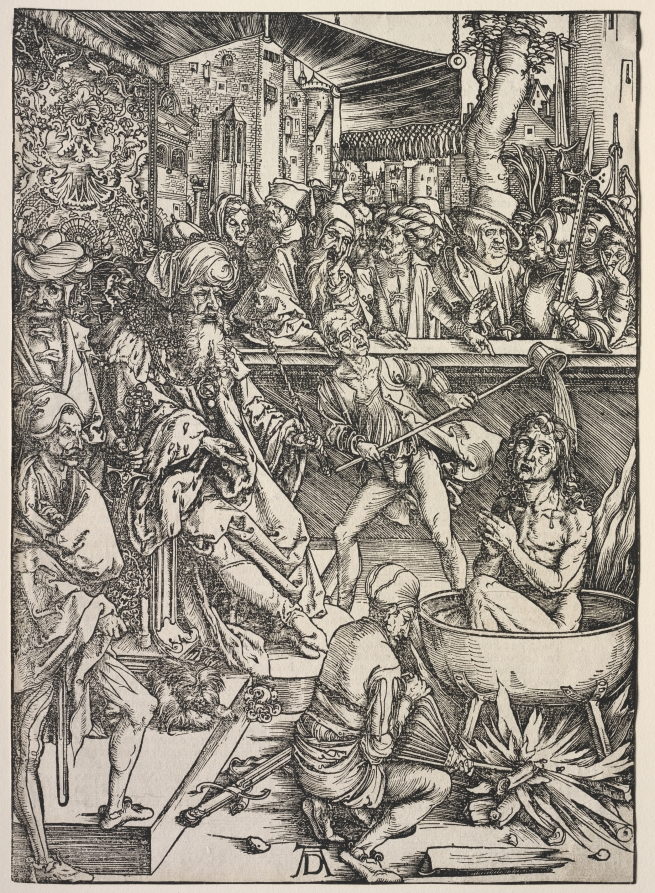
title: Revelation of St. John: Martyrdom of St. John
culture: Germany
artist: Albrecht Dürer (German, 1471–1528)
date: 1511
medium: woodcut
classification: Print